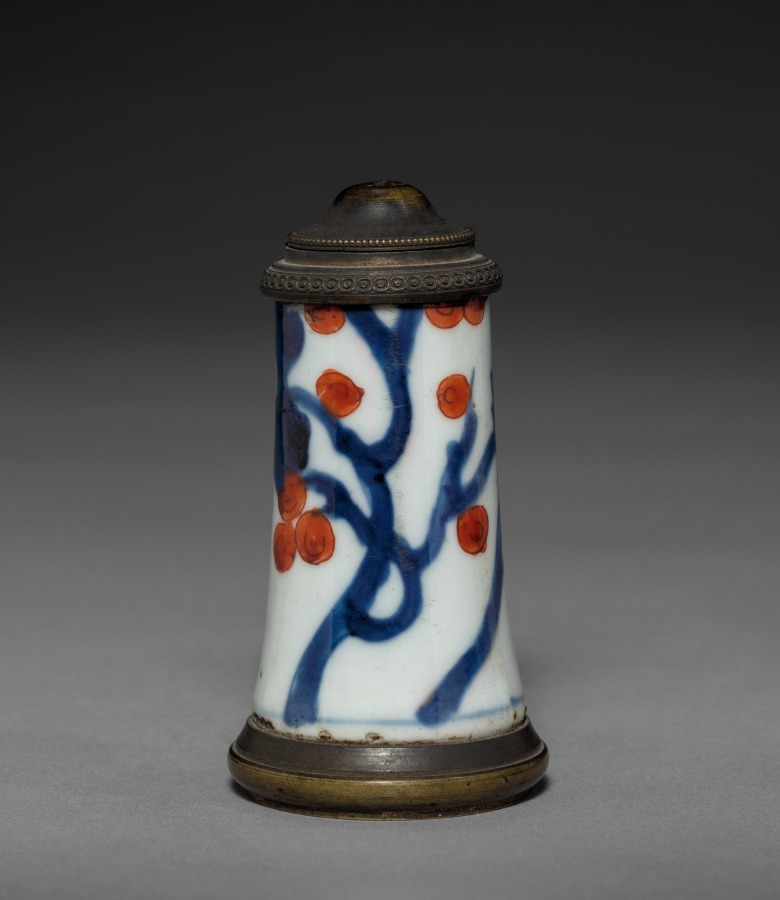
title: Imari Ware (?) Container with Brass Mounts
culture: Japan, Edo period (1615–1868)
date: late 1600s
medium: porcelain with brass mounts (possibly Hizen ware, Arita type, Imari style)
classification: Ceramic